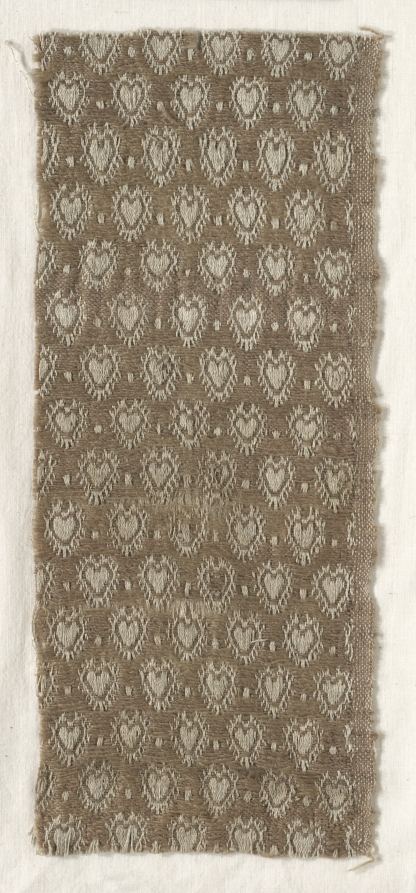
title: Wool and Linen Compound Textile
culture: Spain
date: 1600s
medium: natural linen on woolen ground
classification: Textile